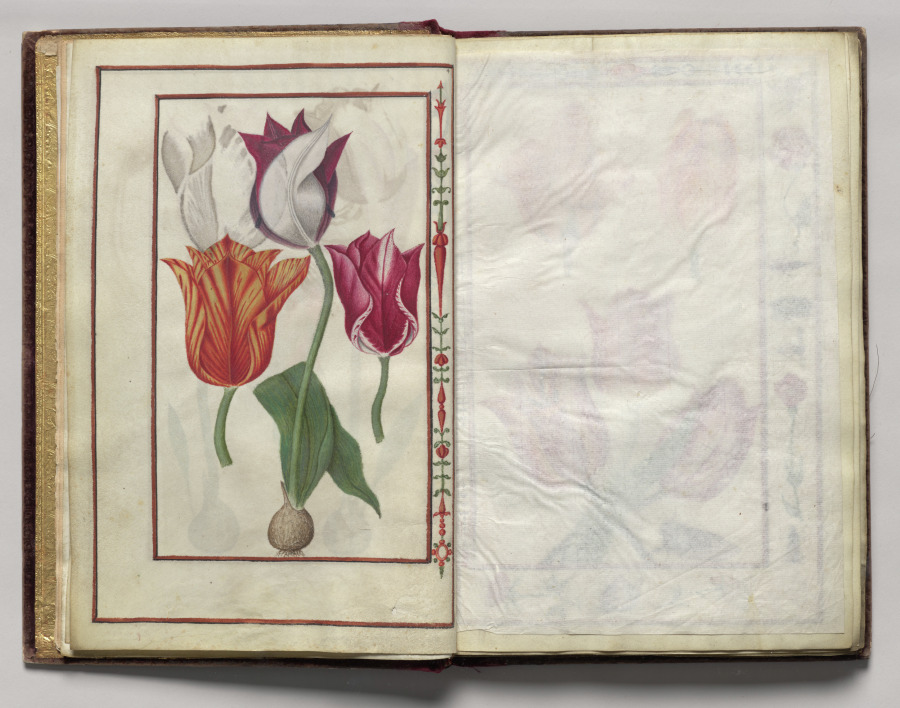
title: Tulips, folio 2 (verso), from Florilegium (A Book of Flower Studies)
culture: France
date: 1608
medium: watercolor, ink, silver, and gold over occasional traces of pencil, on vellum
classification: Bound Volume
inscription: Dated: Poitiers 1608 (on frontispiece) Signed: On frontispiece in black ink, lower right: Van Kuyk Notation on drawing: Frontispiece: in pencil, lower margin: * élève de Van Kessel, peintre flammand (* in pencil also appears in front of Van Kuyk's name).